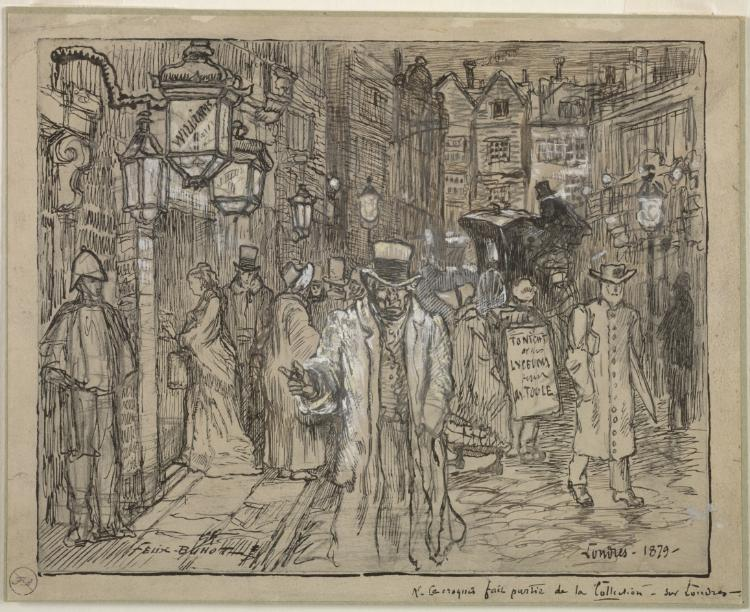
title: Street Scene in London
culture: France, 19th century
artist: Félix Hilaire Buhot (French, 1847–1898)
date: 1879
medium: pen and black and brown ink, black crayon and graphite, heightened with white and yellow gouache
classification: Drawing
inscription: signed, lower left, in black ink: FELIX BUHOT; lower right, in black ink: Lodres - 1879 - / le croquis fait partie de la Collection - sur Londres - ; stamped, lower left, in black ink: FB [circled]